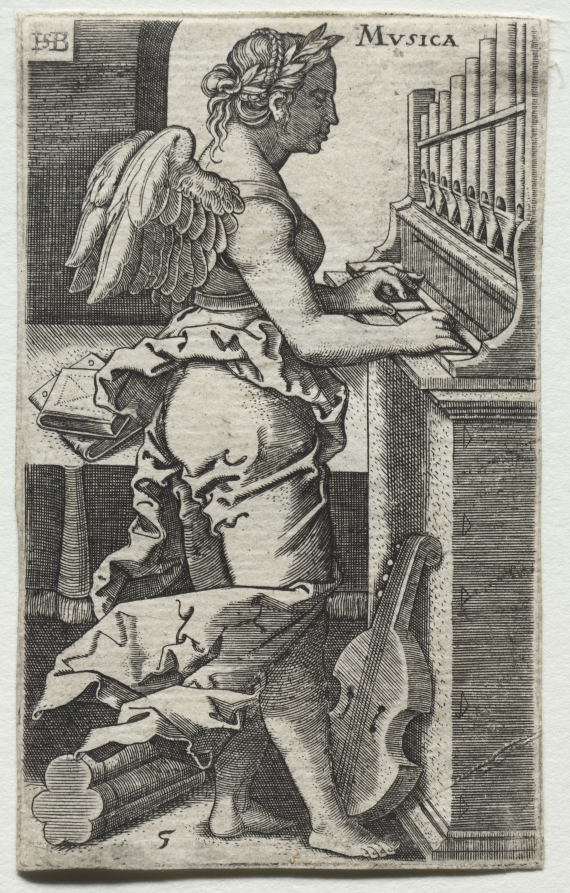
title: Musica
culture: Germany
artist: after Hans Sebald Beham (German, 1500–1550)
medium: engraving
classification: Print